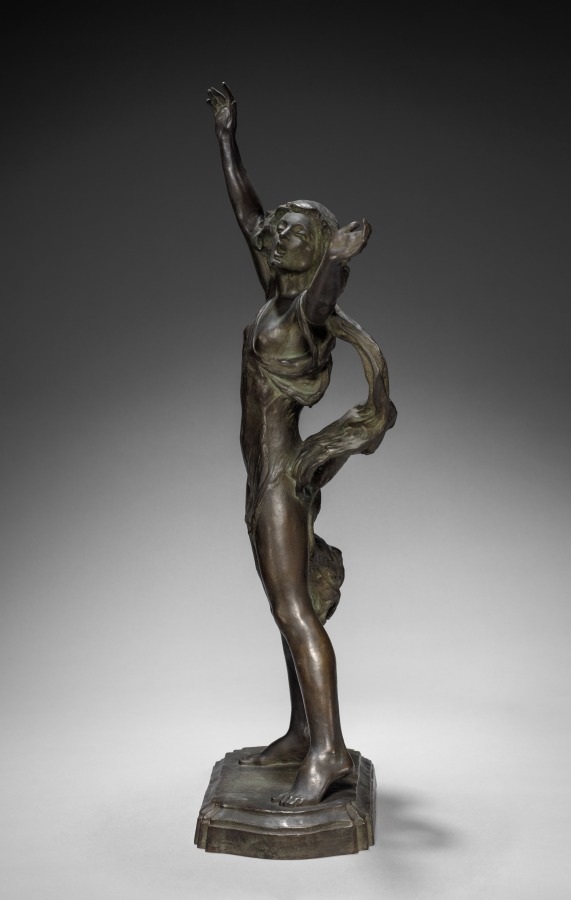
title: Pippa Passes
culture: America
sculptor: Louise Allen (American, 1880–1953)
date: c. 1916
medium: bronze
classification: Sculpture